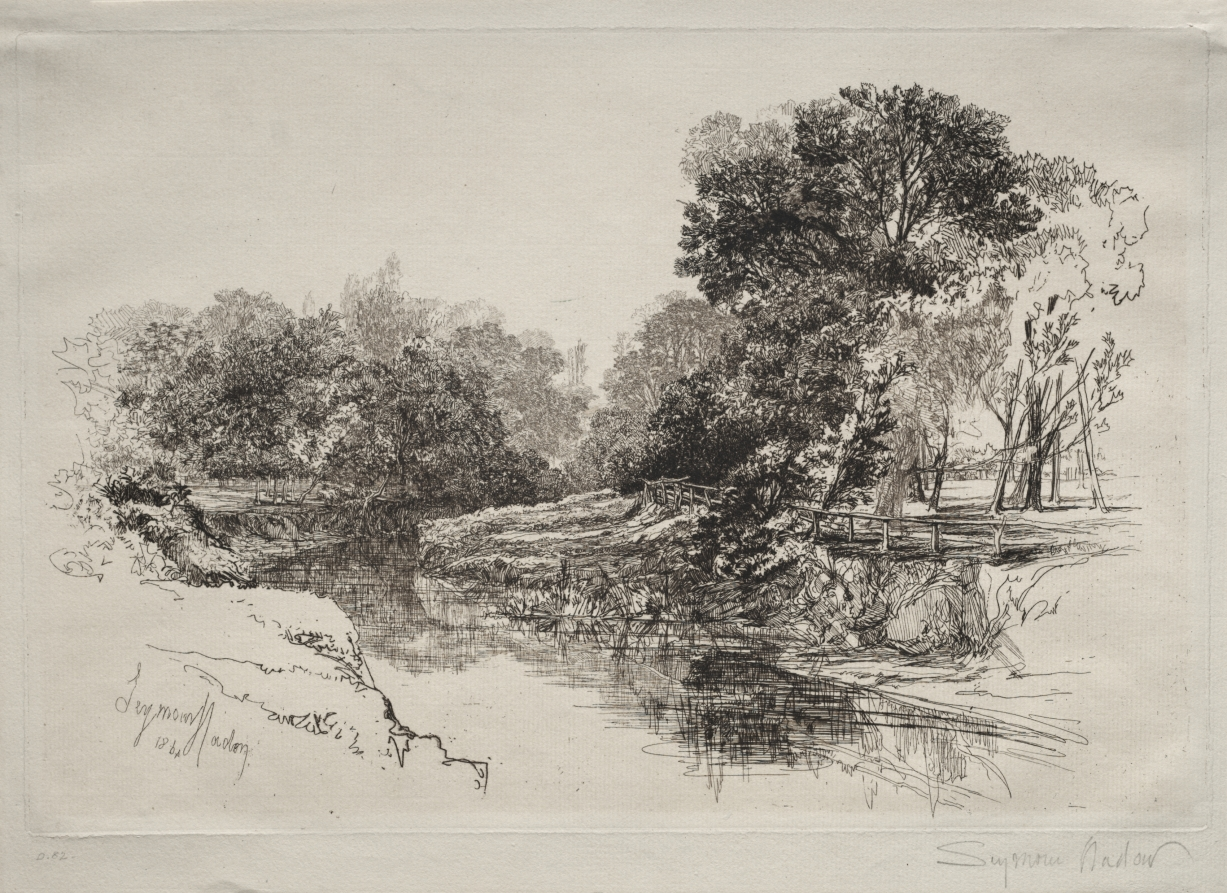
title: A River in Ireland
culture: England, 19th century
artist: Francis Seymour Haden (British, 1818–1910)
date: 1864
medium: etching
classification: Print